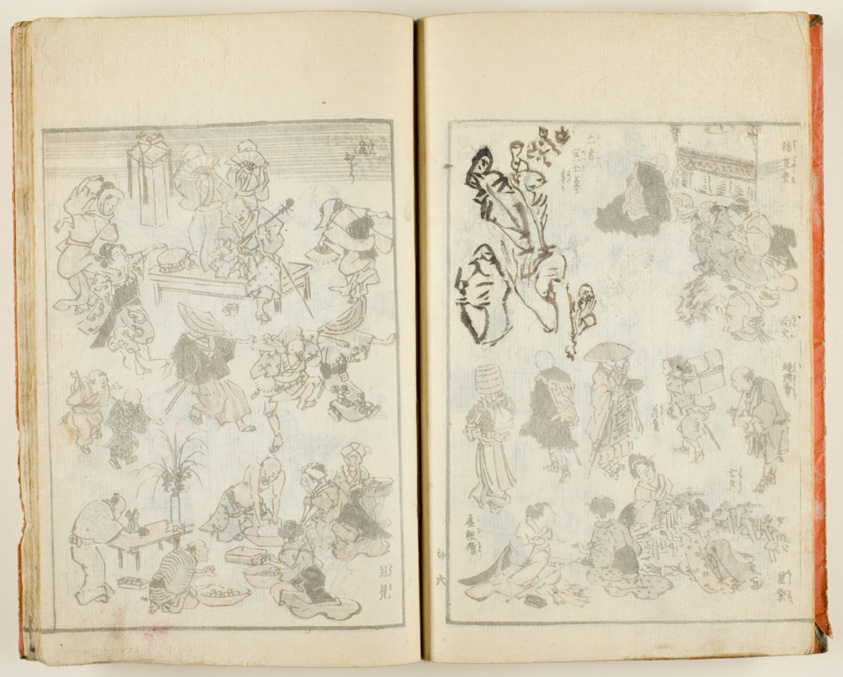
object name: Book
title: Ukiyo gafu (Book of Keisai's Popular Pictures), one vol. of 10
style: Japanese (culture or style)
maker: Keisai Eisen (Japanese, 1790-1848)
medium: Book; woodblock printed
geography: Japan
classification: book; woodblock print